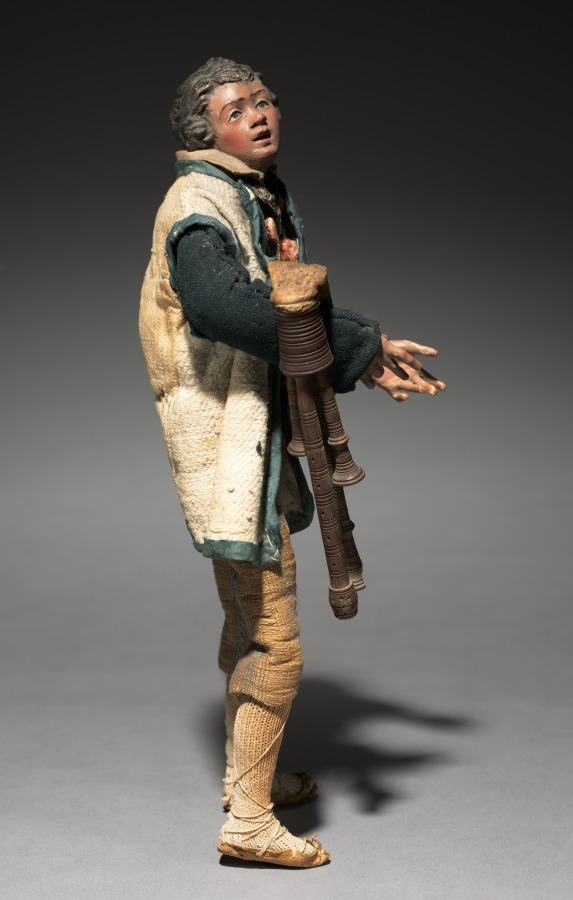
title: Figure from a Crèche: Piper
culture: Italy, Naples, late 18th-early 19th century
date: 1780–1830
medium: painted wood and terracotta with various textiles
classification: Sculpture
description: The practice of creating scenes of the Nativity for the home dates from the early 1700s in Italy, where people began to set up doll-like figures of about a foot or less in height. The custom was particularly popular in Naples around 1800, where crèche scenes (crèche means cradle, or crib) included many figures, whose heads and hands of painted terracotta, stuffed cloth bodies, and clothing adapted from contemporary local costumes gave them an amazingly realistic character. Representations of the birth of Jesus can be traced to the first few centuries of Christianity. Both living creatures and sculptural depictions of them were used from early times. By the late middle ages it was customary to create life-size figures of wood or stone, naturalistically painted, to represent the characters who participated in the events of Jesus's early life. These sculptures were then arranged in scenes illustrating one or both of the most important of these events, the Adoration of the Shepherds and the Adoration of the Magi-the three kings from the East who came to pay homage to the Christ child. Used in churches, these large figures were especially popular in Italy, Central Europe, Spain, and Portugal.